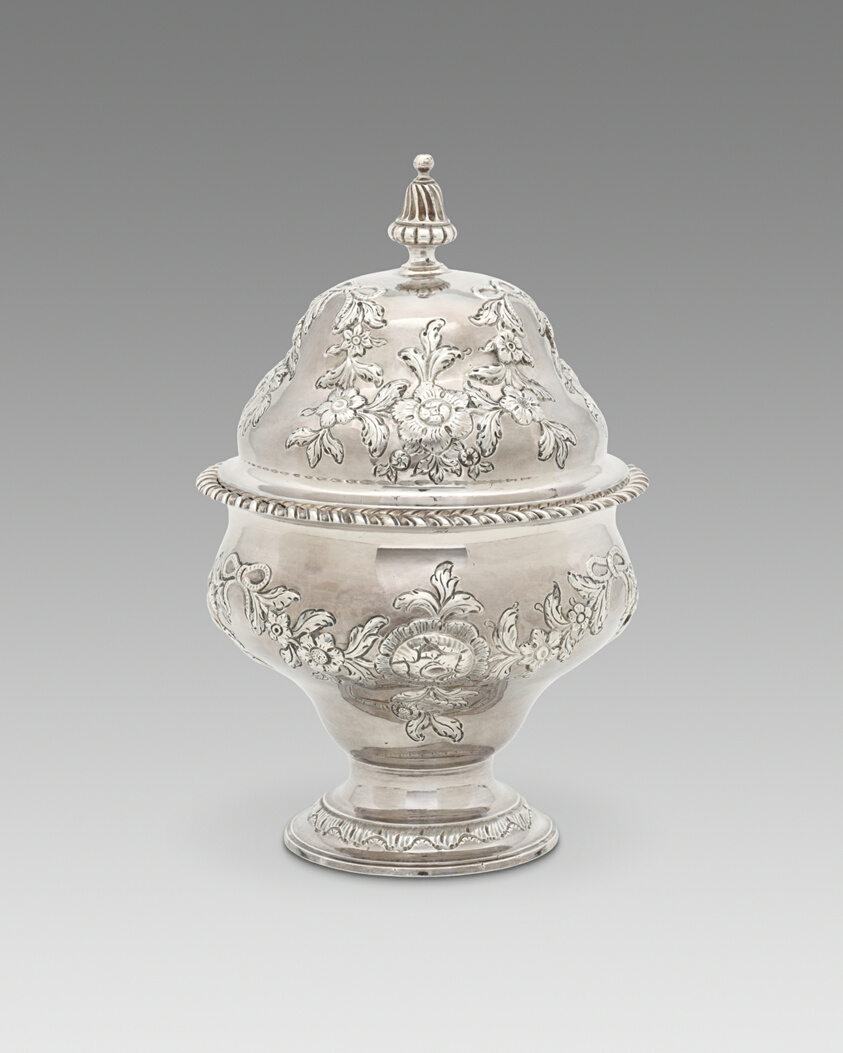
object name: Metalwork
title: Covered Sugar Bowl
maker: Bancroft Woodcock; American, 1732–1817; Wilmington, Delaware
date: 1765–75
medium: Silver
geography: Wilmington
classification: sugar bowl; silver; american decorative arts; american arts; decorative arts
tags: dining, drinking